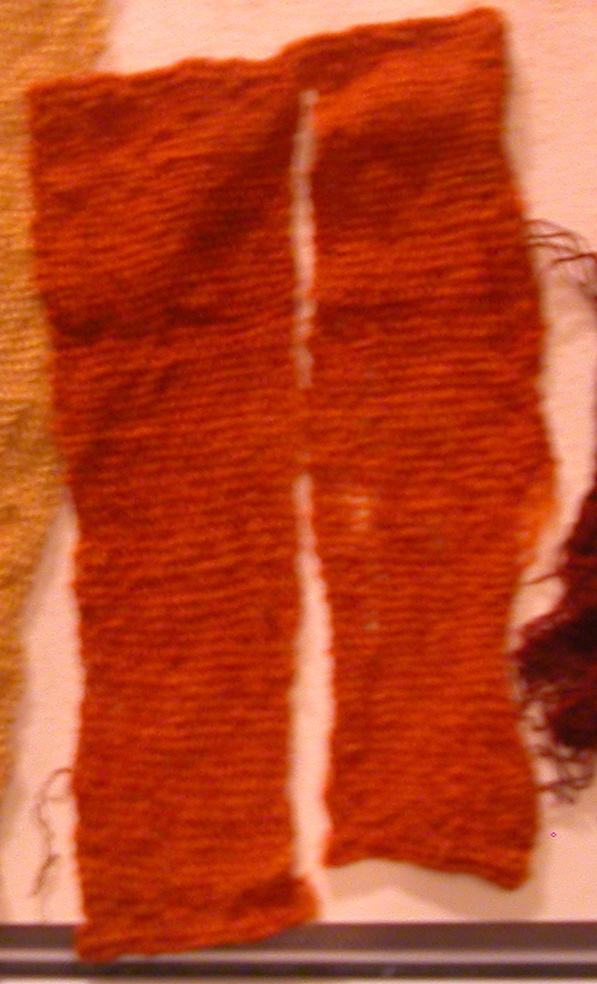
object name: Textile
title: Fragment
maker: Peru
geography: Peru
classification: textile; weaving